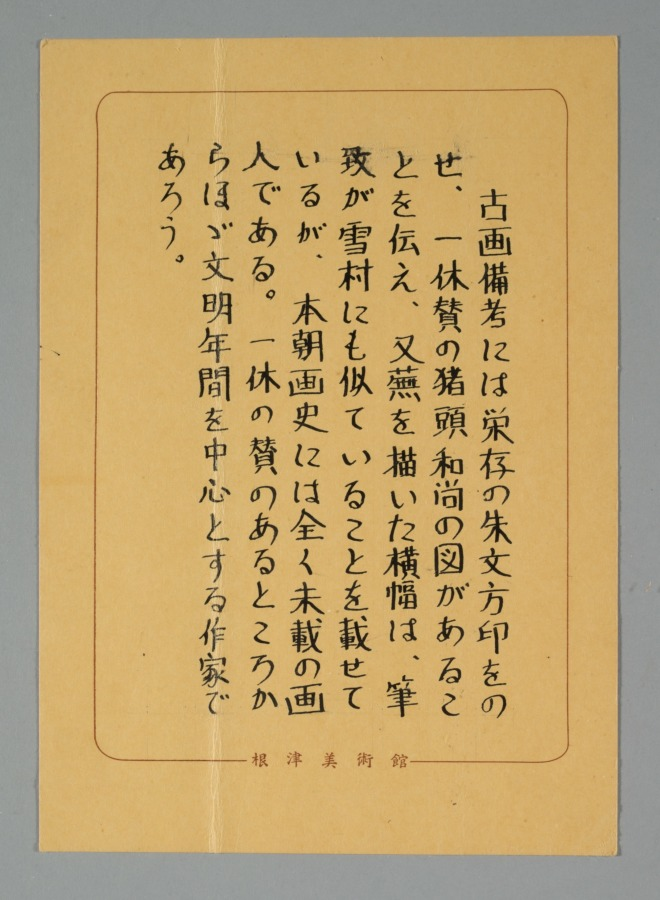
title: Wagtails and Narcissus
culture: Japan, Muromachi period (1392–1573)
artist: Eison (Japanese)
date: mid-1500s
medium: hanging scroll; ink on paper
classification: Painting